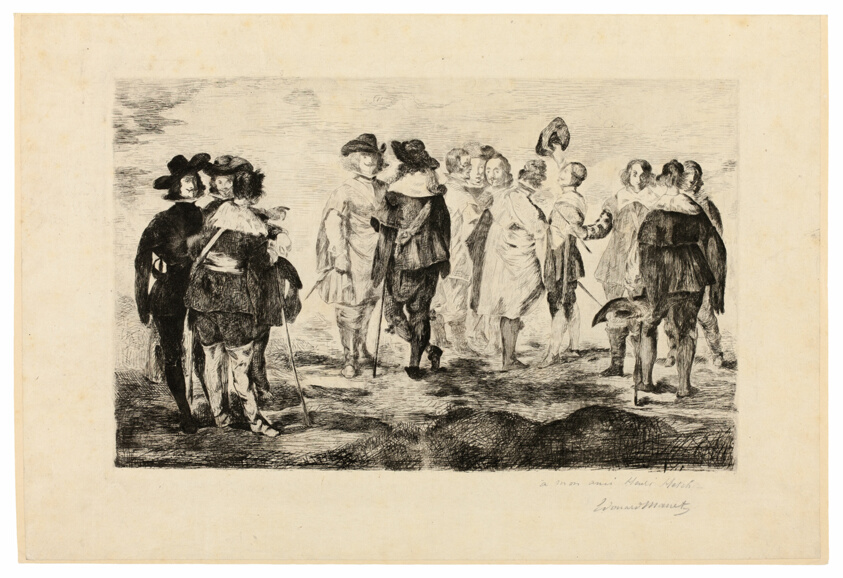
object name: Print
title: The Little Cavaliers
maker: Édouard Manet (French, 1832-1883); after Diego Velázquez (Spanish, 1599-1660)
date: 1867/74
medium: Etching, drypoint, roulette and bitten tone in black on ivory Japanese paper, laid down on tan wove paper (chine collé)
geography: France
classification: etching; print; prints and drawing